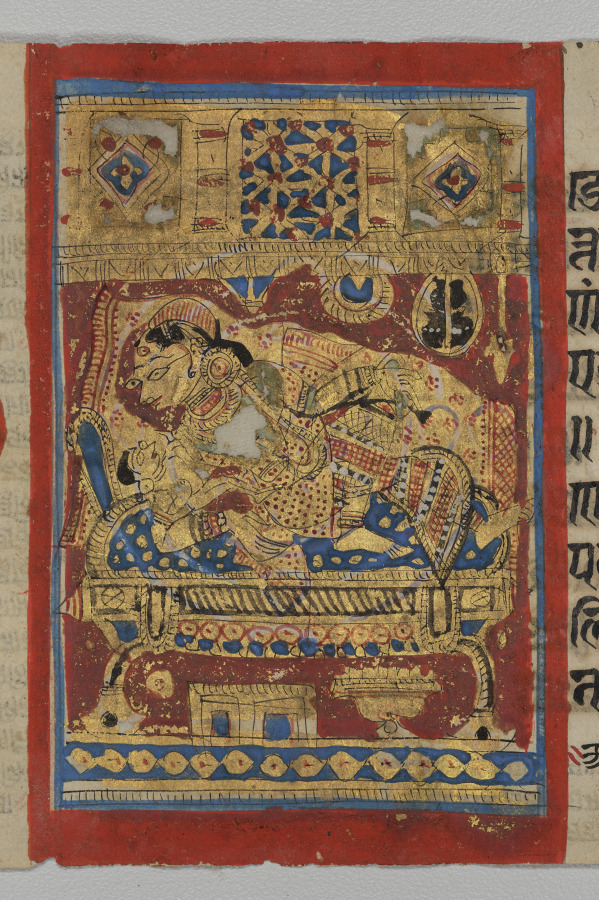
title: Birth of Mahavira, folio 30 (verso), from a Kalpa-sutra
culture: Western India, Gujarat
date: c. 1475–1500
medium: Gum tempera, ink, and gold on paper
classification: Painting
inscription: [[upper left]] Śrī Ma* janma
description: Accounts of the lives of liberated beings of the Jain religion are illuminated with special emphasis on the miraculous circumstances leading to the birth of its historical founder Mahavira (500s BCE). For Jains, liberated beings are not reborn after they die; they exist eternally in a blissful meditative state. After a divinity miraculously implanted the embryo of Mahavira into the womb of Queen Trishala, she dreamed of 14 good omens. Later in the manuscript is an intimate moment between the mother and her special newborn. The bold and costly palette lends the paintings an otherworldly quality.